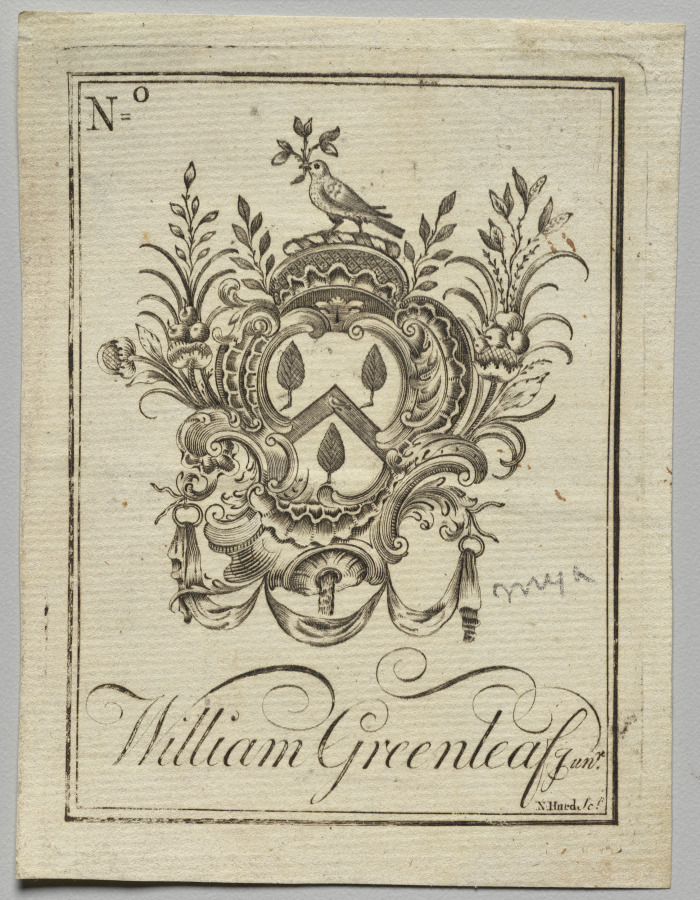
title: Bookplate: Coat of Arms with William Greenleaf Jun.r inscribed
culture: America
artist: Nathaniel Hurd (American, 1730–1778)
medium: engraving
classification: Print